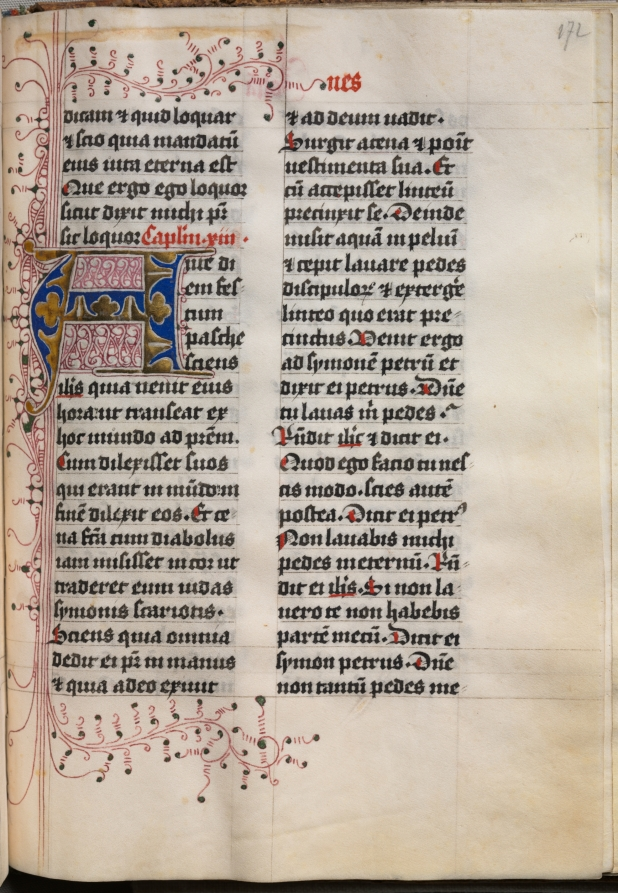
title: Gospel Book with Evangelist Portraits: Decorated Initial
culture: Germany, Middle Rhine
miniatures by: Master of the House-Book (German, c. 1470–1500)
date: c. 1480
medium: ink, tempera, and gold on vellum; original blind stamped leather binding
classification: Bound Volume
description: The four gospels are preceded by a full-page portrait miniature of the appropriate evangelist. Per tradition, they are represented as contemporary scribes surrounded by all the tools of their trade— ink pots, quill pens, and penknives. The anonymous illuminator of these miniatures, called the Hausbuch Master, is known primarily for an album of lively drawings as well as some 90 copper engravings now in Amsterdam. He was also apparently a panel painter of some distinction. The skillful pen work, tracery, and vine scrolls, as well as the large initials, are the work of other artists.The binding is original.